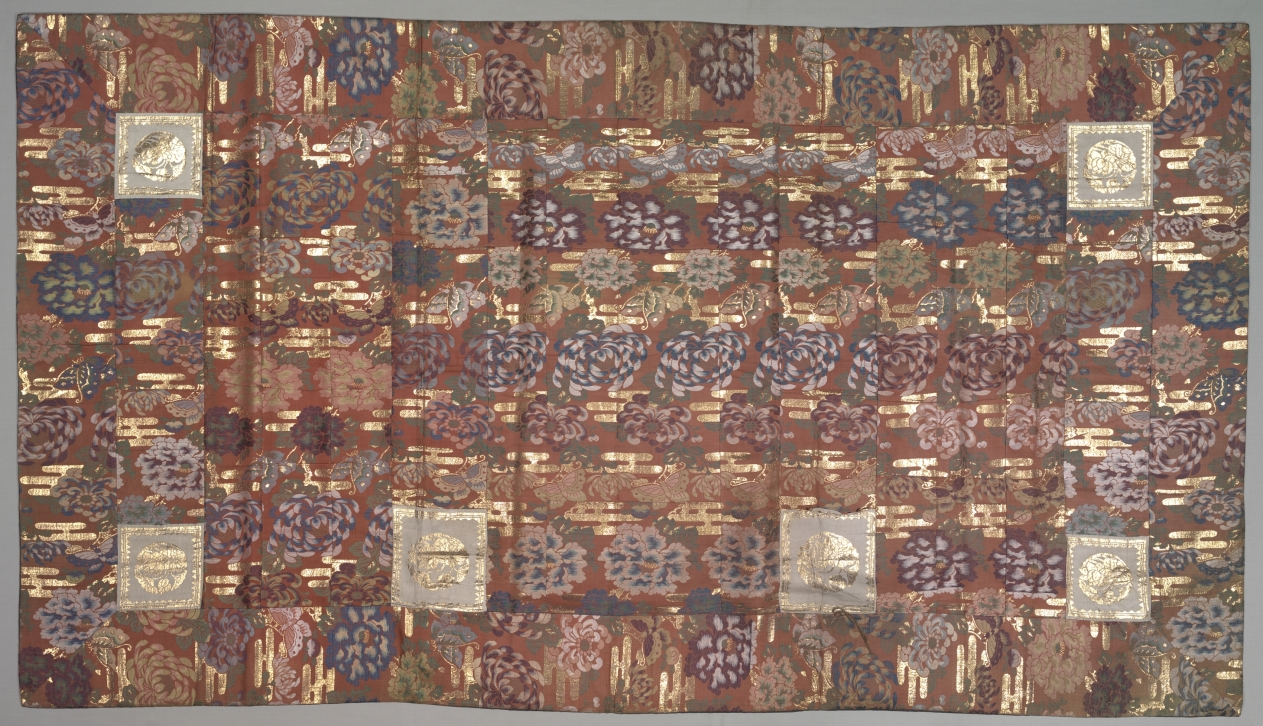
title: Buddhist Vestment (Kesa)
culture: Japan, Meiji period (1868–1912)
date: late 1800s-early 1900s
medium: diasper satin; silk and gilt paper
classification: Garment